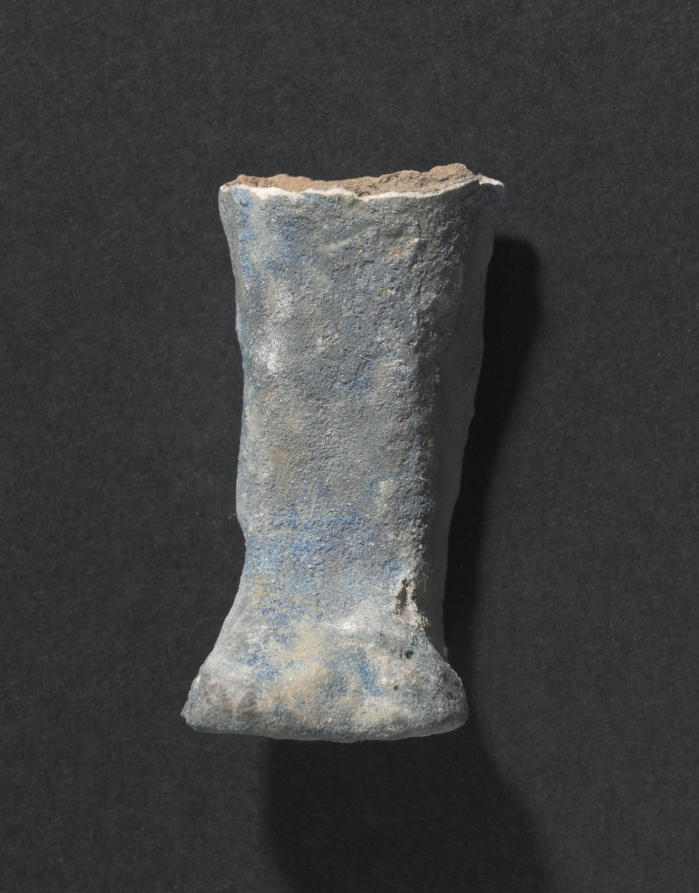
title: Shawabty of Ditamenpaankh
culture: Egypt, Late period (715–332 BCE), Dynasty 25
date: 715–656 BCE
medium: terracotta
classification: Funerary Equipment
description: High demand for shawabtys in the Late Period, a time when as many as 400 or more shawabtys were placed in the tomb with the deceased, gave rise to a specialized container for storing them: the shawabty box. This example is inscribed for the lady of the house, Ditamenpaankh, and was probably one of a pair originally made for her. The single-masted boat on the box's lid is perhaps an allusion to the pilgrimage of the deceased to the holy city of Abydos, the cult city of Osiris, king of the dead. The shawabtys inside are crude, mass-produced examples cast in an open mold. Made of terracotta, their blue paint imitates more costly shawabtys made of faience. As for the shawabty spell, it has been removed from its traditional location on the shawabty's front and relocated onto the sides of box, where it needed only to be written once, thus expediting production.